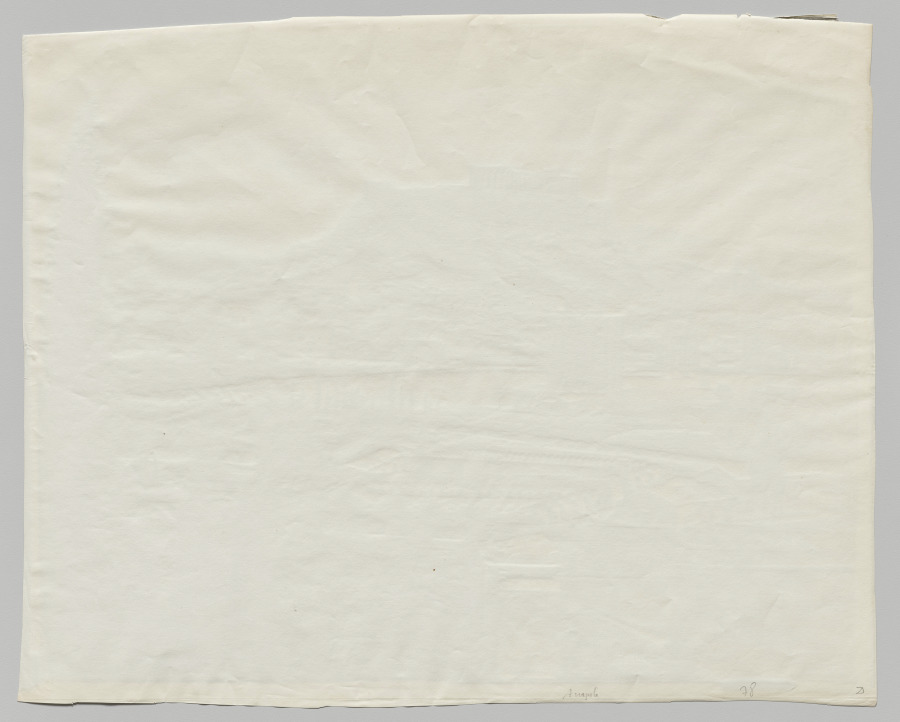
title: View of the Acropolis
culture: France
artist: Adolphe Braun & Co. (French, 1845–1894)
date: c. 1880s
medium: mammoth carbon print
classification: Photograph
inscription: Written in pencil on verso: "Acropole"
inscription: Written in pencil on verso: "78"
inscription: Written in pencil on verso: "D"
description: Adolphe marketed his photos of flowers, artworks, landscapes, and monuments from across Europe throughout that continent and in North America. The Acropolis of Athens, the most famous ancient Greek site, must have sold well; Braun offered multiple views of it. The image on a carbon print is formed from pigmented gelatin, which is far more resistant to fading than the silver or metal salts in silver-based prints.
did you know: Carbon prints are among the stable and long-lasting photographic processes.